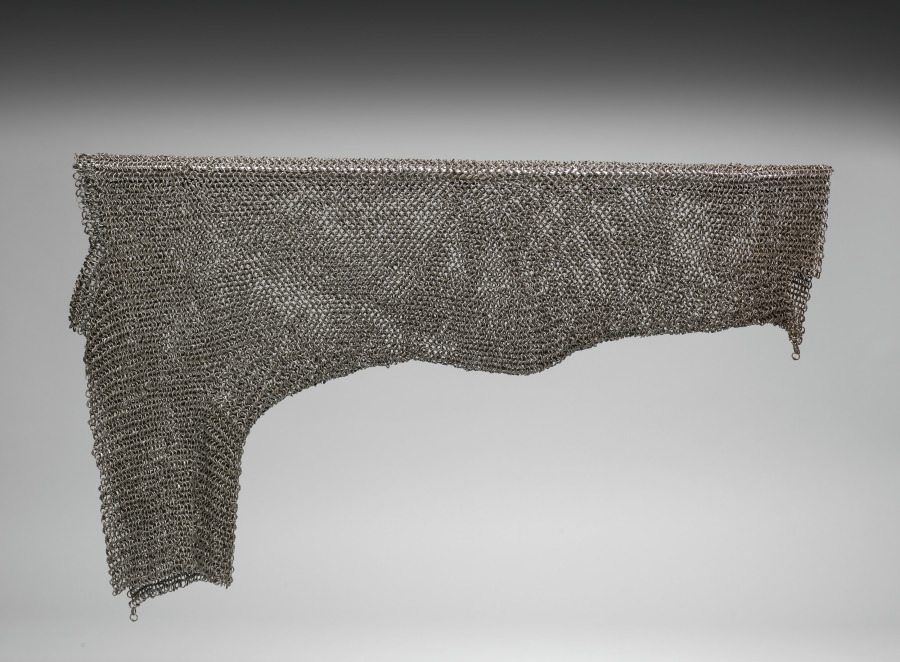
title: Sleeve of Chain Mail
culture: Germany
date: 1500s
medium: steel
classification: Arms and Armor